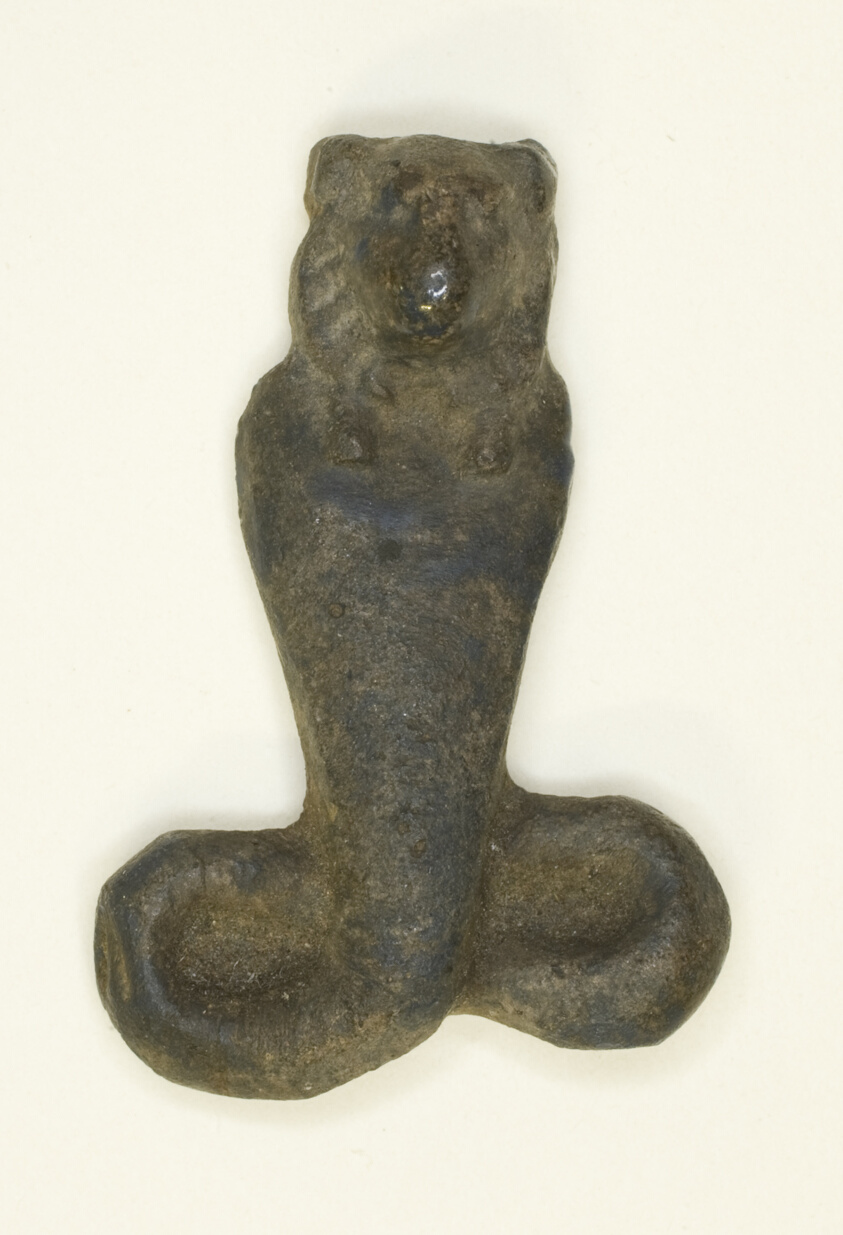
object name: Costume and Accessories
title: Amulet of a Lion-Headed Cobra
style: egyptian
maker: Egyptian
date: Ptolemaic Period–Roman Period, 4th century BCE–4th century CE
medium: Faience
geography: Egypt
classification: amulet; jewelry; glass; ancient art; costume; faïence (composite material)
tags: goddesses, cobras, lions